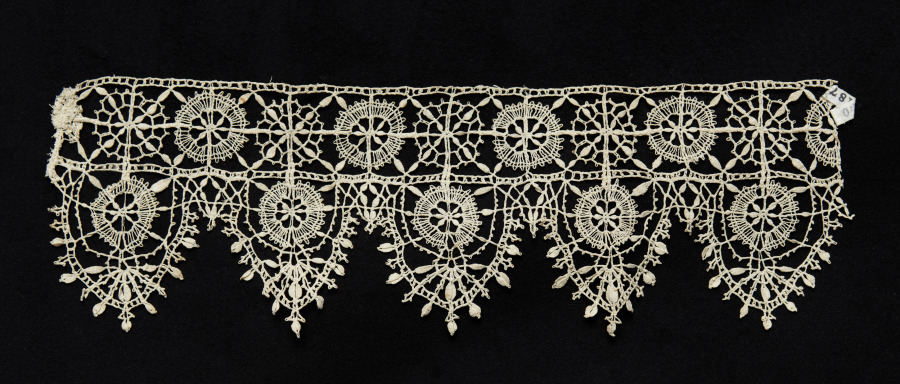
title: Lace Insertion and Edging of Points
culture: Italy, Genoa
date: 1550s–90s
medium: Bobbin lace (needle lace, reticella design)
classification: Lace